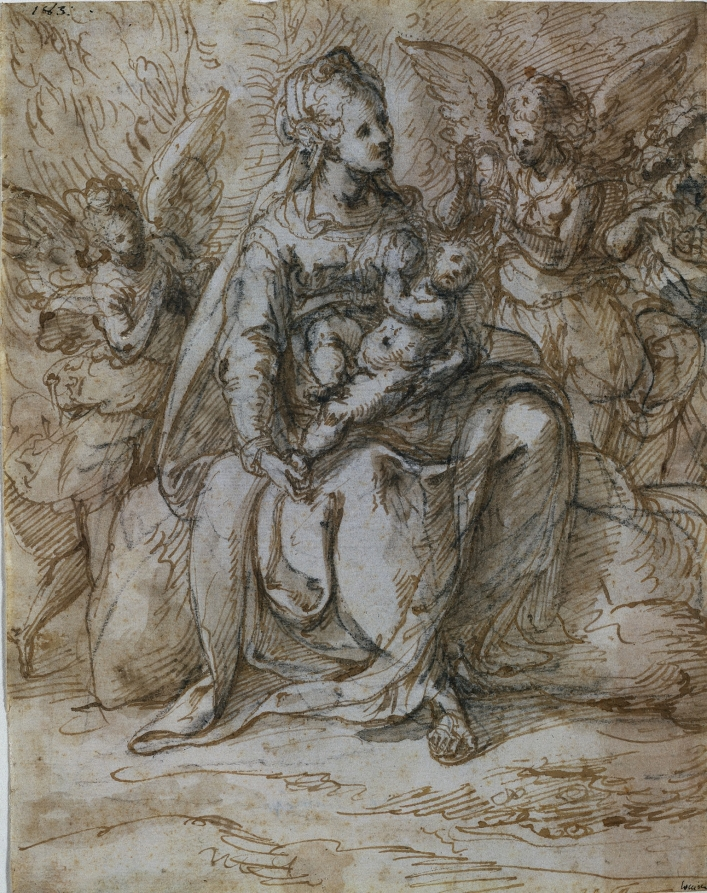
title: Madonna and Child with Angels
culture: Italy, 16th century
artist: Aurelio Luini (Italian, 1530–1593)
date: late 1500s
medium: pen and brown ink and brush and brown wash over black chalk (extended with brush and water in places); pricked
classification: Drawing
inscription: upper left, in black ink: 183: ; lower right, in black ink: Luino ; VERSO, upper right, in brown ink: Aurelio Lupin. ; lower center, in brown ink: Gio ane Fiamig[r?]o ; lower left, in black ink: 9311. ; upper center, in graphite: 20 ; throughout center, in graphite: [illegible] ; lower center, in graphite: G[illegible] [erased] / G[illegible] [erased] ? ; lower right, in graphite: 85[7?]